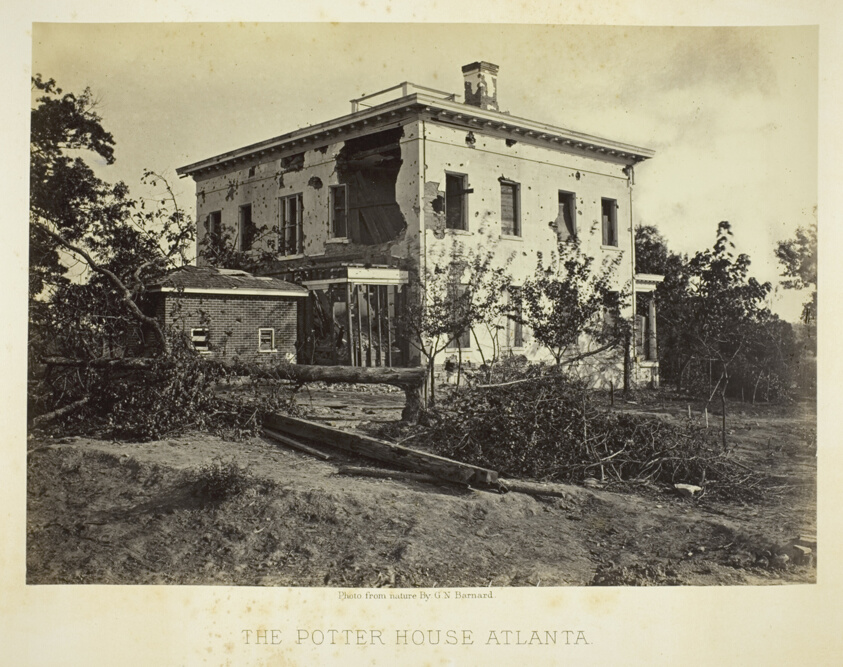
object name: Photograph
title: The Potter House Atlanta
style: 19th century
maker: George N. Barnard (American, 1819–1902)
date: 1864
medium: Albumen print, plate 38 from the album "Photographic Views of the Sherman Campaign" (1866)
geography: United States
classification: albumen silver print; photographic process; photography; photograph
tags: Collected by Hugh Edwards, Sherman's Campaign 1866, documentary